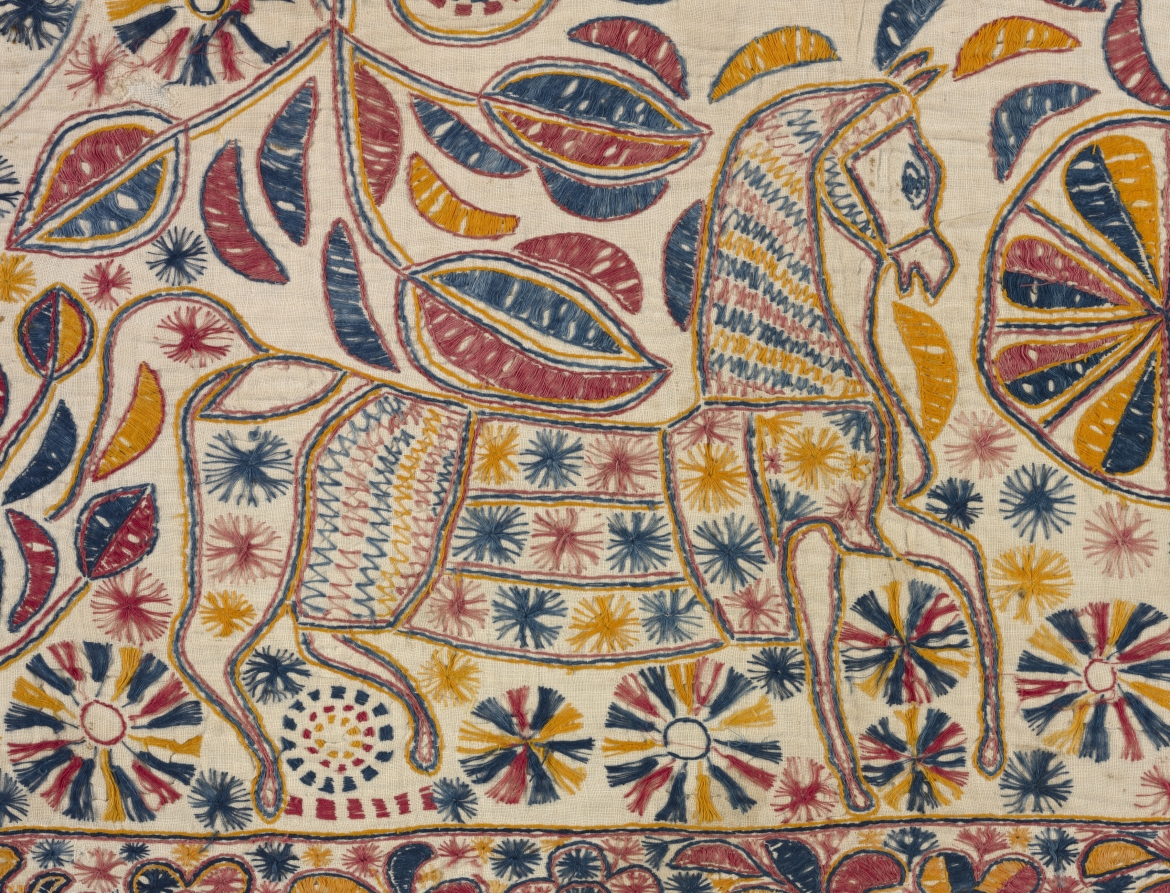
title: Kantha (Ceremonial Quilt)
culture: India, East Bengal, 19th century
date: 1800s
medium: embroidery: cotton thread on cotton tabby ground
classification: Embroidery